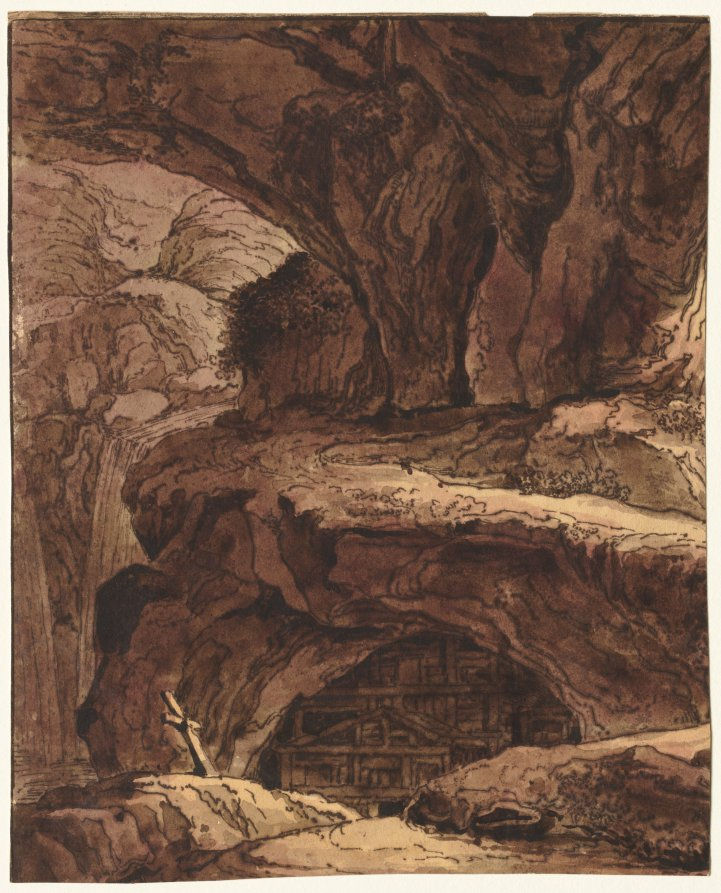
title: Rocky Landscape with a Cave Chapel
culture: Flanders, 19th century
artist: attributed to Johann Martin von Rohoden (Flemish, 1778–1868)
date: 19th century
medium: pen and brown ink and brush and brown and purple wash; framing lines in brown ink (left side and top)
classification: Drawing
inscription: VERSO OF SECONDARY SUPPORT: lower left, in graphite: FLEMISH EARLY 17th c. ; lower right, in graphite: K06689